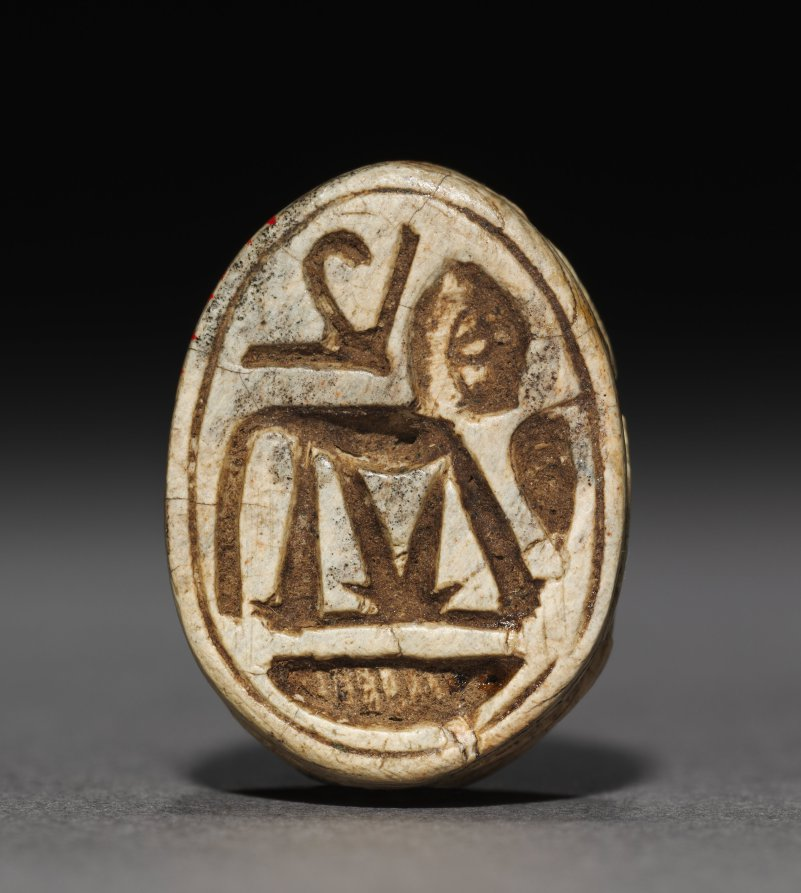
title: Scarab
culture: Egypt, Modern forgery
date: 1900–1914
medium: steatite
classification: Scarabs